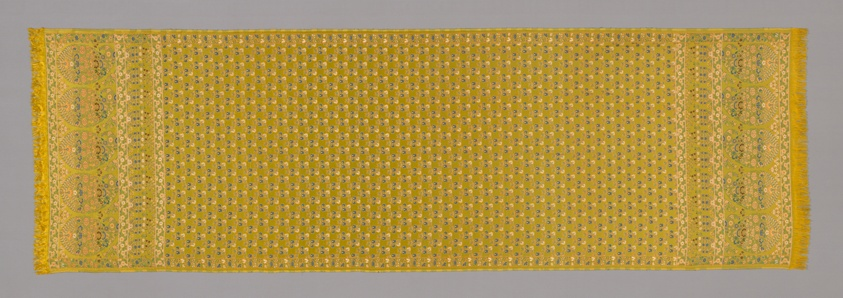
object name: Costume and Accessories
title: Sari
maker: India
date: Late 19th century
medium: Yellow satin with floral design in white and colors; borders of cone pattern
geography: India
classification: textile; weaving; costume; dress (garment); clothing; sari (garment)